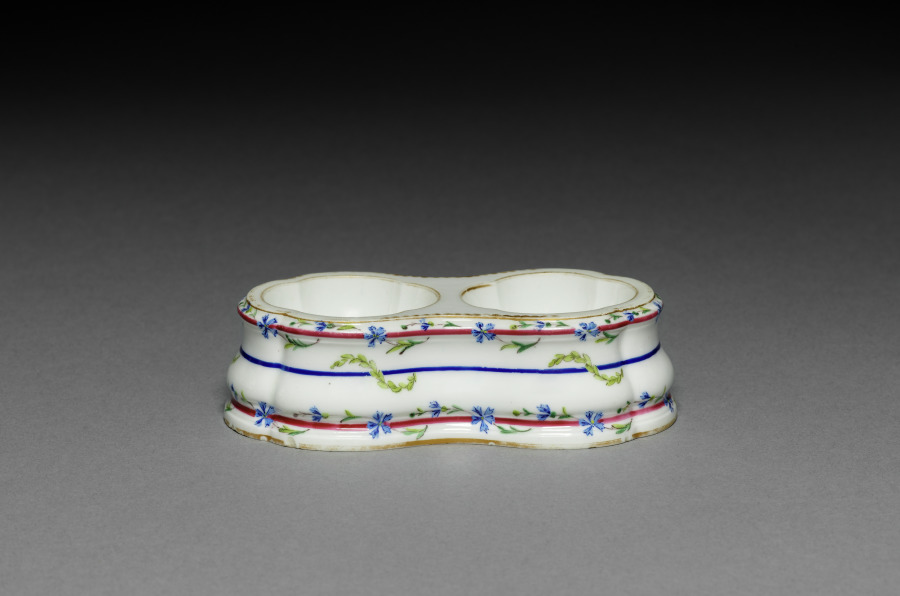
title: Double Salt Dish (Salière)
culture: France, Sèvres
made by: Sèvres Porcelain Factory (French, est. 1756)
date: 1790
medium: Hard-paste porcelain with enamel and gilt decoration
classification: Ceramic